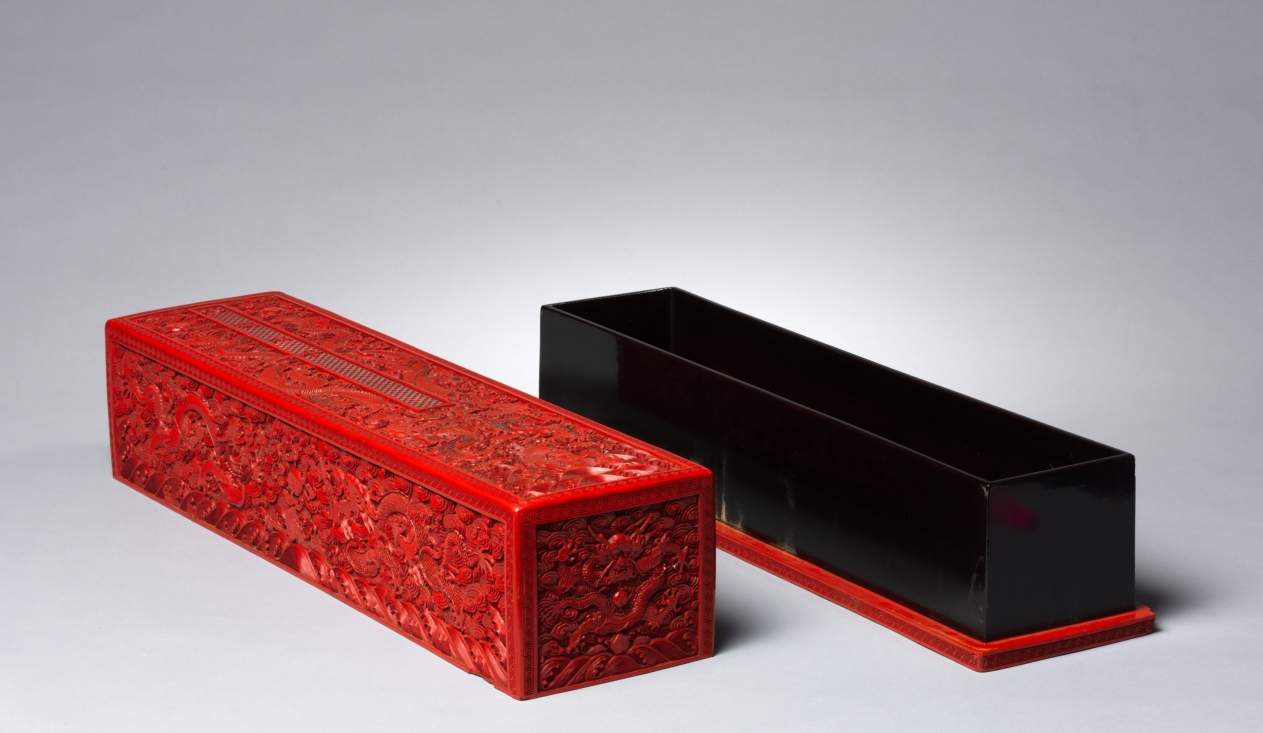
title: Carved Lacquer Scroll Box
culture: China, Qing dynasty (1644–1911), Qianlong reign (1736–95)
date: 1736–95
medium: Red carved lacquer on wood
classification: Lacquer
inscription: 心寫治平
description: The elaborate design, superior craftsmanship, and inscription carved into the red cinnabar lacquer proclaim the imperial pedigree of this scroll box. On either end is a five-clawed dragon, a design reserved only for an emperor. More dragons twist and wind through swirling clouds and waves along the length of the box’s sides and top. The carving is intricate and vigorous, while the design is controlled and regular. This box housed the private portraits of the Qianlong Emperor, his empress, and 11 other favorites among his presumed 40 or more wives during his 60-year reign. It was commissioned to be made in Suzhou when no more portraits were added to the scroll. An entry in the imperial workshop records relates to the Cleveland box. It states that in 1787, a box design with a dragon pattern, including the inscription, In his heart is envisioned a peaceful reign, was sent to a Suzhou workshop. Imperial portraits were collected in the Chonghua Palace in the Forbidden City, and the emperor’s portrait was kept in this red lacquer box from Suzhou.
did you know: This is the original box for the handscroll Portraits of the Qianlong Emperor and His Twelve Consorts, CMA 1969.31.